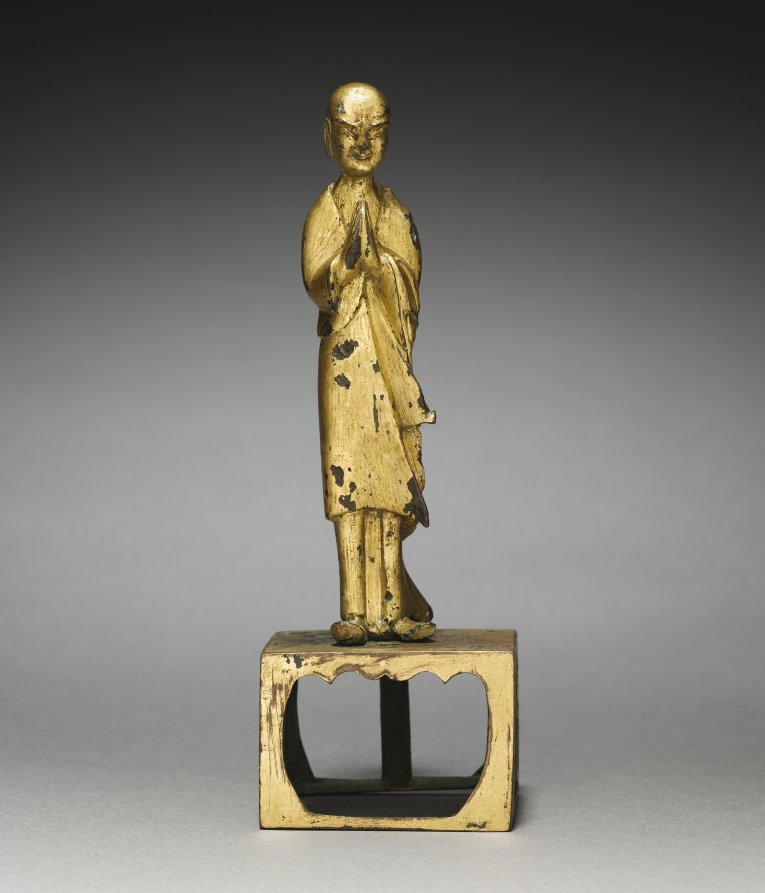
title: Adoring Monk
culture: China, Northern Wei dynasty (386-534)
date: early 500s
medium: gilt bronze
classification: Sculpture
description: Portable Buddhist figures and objects like this gilt bronze had a variety of uses. They could have been carried in religious processions. Others could serve as donations, souvenirs, or votive items in the context of pilgrimages to religious sites. Their miniature size also made them appropriate for placement on private altars or shrines for personal devotion.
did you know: The monk stands with his hands together in a reverent greeting.